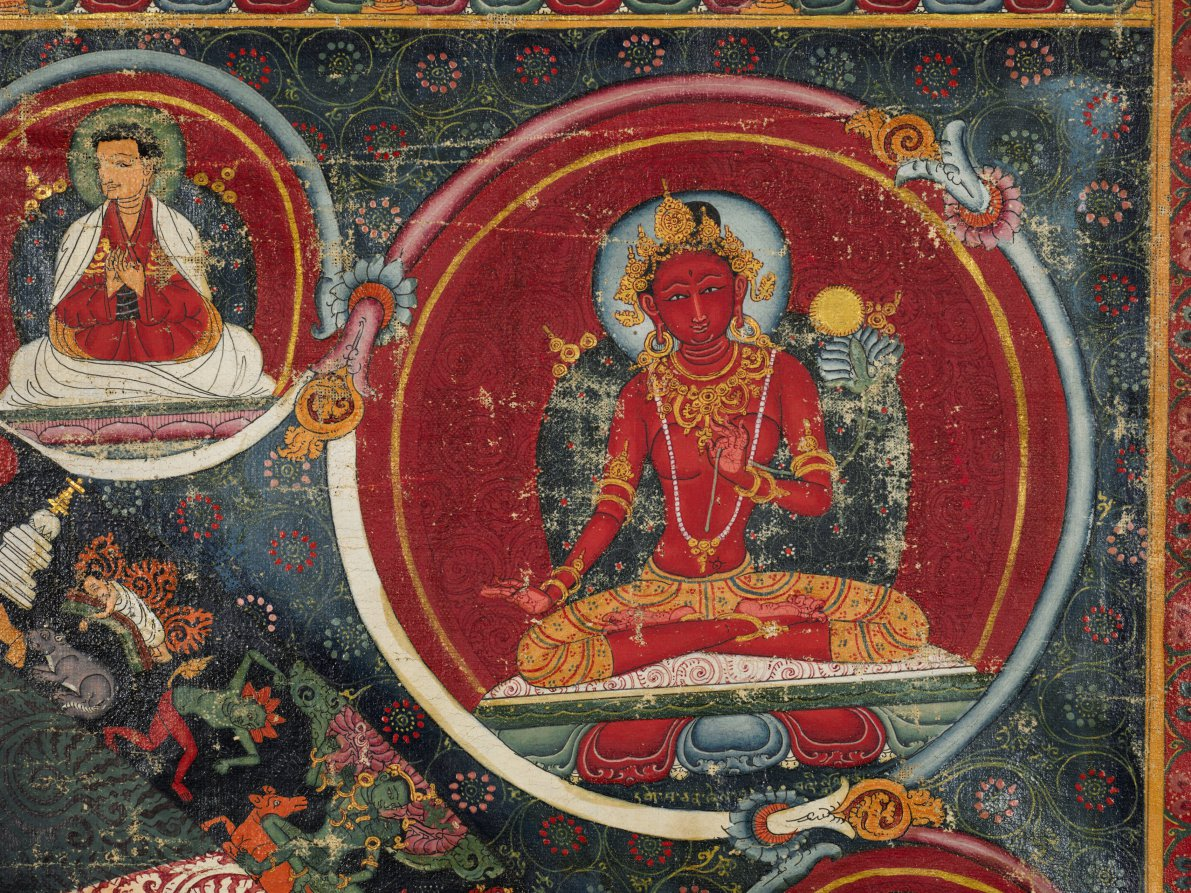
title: Twenty-three Deity Nairatma Mandala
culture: Central Tibet, Sakya-affiliated monastery, 14th century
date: c. 1375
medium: Gum tempera, ink, and gold on cloth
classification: Painting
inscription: The inscription along the bottom says: Twenty-three deity Nairatma Mandala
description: One of the main types of imagery in tantric Buddhist art is the mandala, a two-dimensional diagram of the realm of an enlightened being. This mandala depicts the palace of Nairatma, who dances in the center surrounded by her entourage. Using the painting as a guide, the tantric practitioner in meditation mentally projects the two-dimensional plan into three-dimensional space and enters into it. The outermost ring contains depictions of the cremation grounds, where corpses are being burned and consumed, as well as tantric yogis and masters who work there in order to understand the impermanence of the body, defeat their fear of death, and overcome irrational aversions to impure aspects of life. Virupa is depicted twice, always pointing to arrest the sun with his raised left hand. He sits among the row of lineage masters along the top edge, and is also depicted in the topmost segment of the ring of cremation grounds, being served a cup of liquor. Along with lineage masters at the top of this impressive painting, bodhisattvas and important masters are depicted in the spandrels, each identified by an inscription.